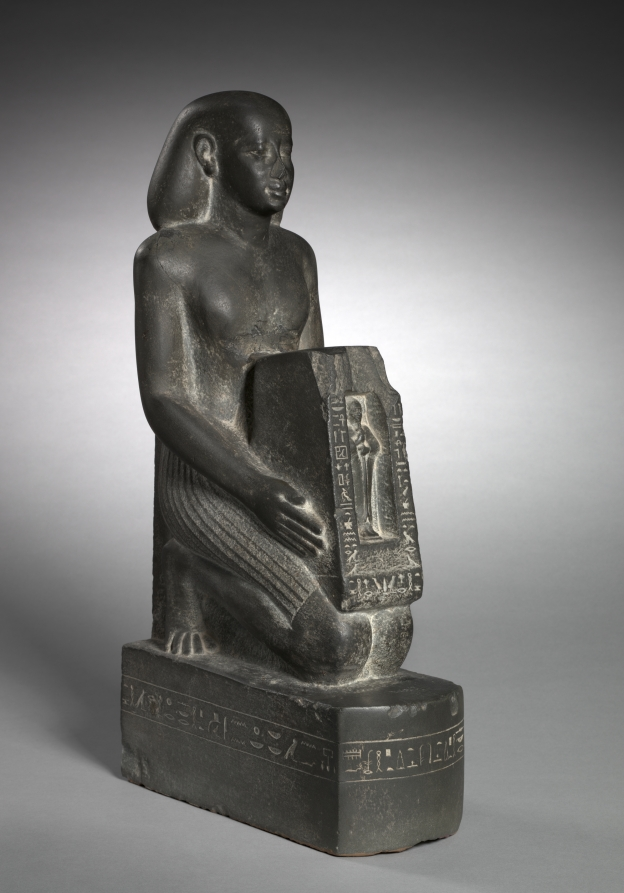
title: Naophorous Statue of the Finance Officer and Overseer of Fields, Horwedja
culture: Egypt, Late period (715–332 BCE), Dynasty 27, reign of Darius I (522–486 BCE)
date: 521–486 BCE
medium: graywacke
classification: Sculpture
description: Naophorous (naos.bearing) statues show the subject holding a naos, or shrine, containing an image of a deity, in this case the god Ptah of Memphis. These statues were very popular during the Late Period. Almost invariably they are of hard stone, made to last for eternity. As finance officer under Darius I, Horwedja was in a good position to afford such a monument. Darius I was the second Persian king to rule over Egypt and the only one who seems to have had a genuine appreciation of the country. Egypt prospered under his rule, and the arts flourished.